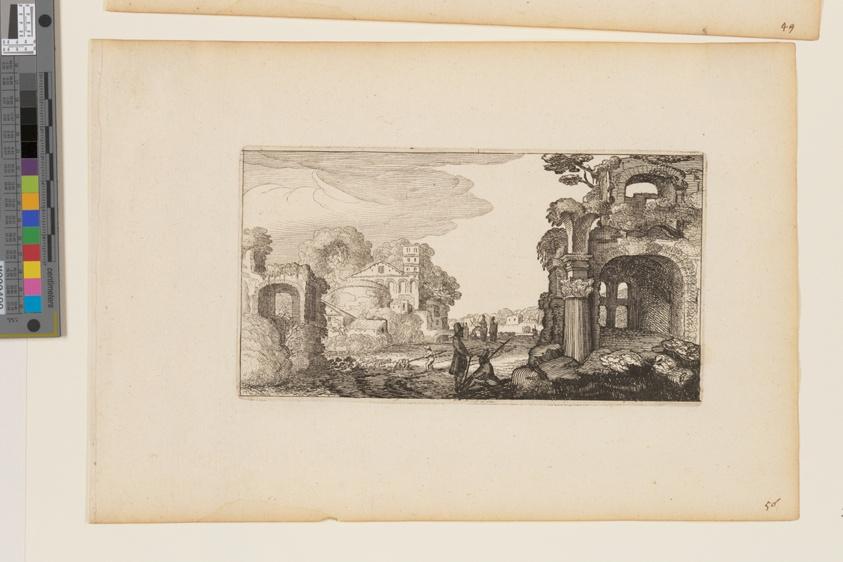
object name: Print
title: Path between Roman Ruins, from Twelve landscapes with Figures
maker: After Gillis van Scheyndel; Dutch, 1595–1660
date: 1624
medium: Etching on ivory laid paper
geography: Netherlands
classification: etching; paper; print; prints and drawing